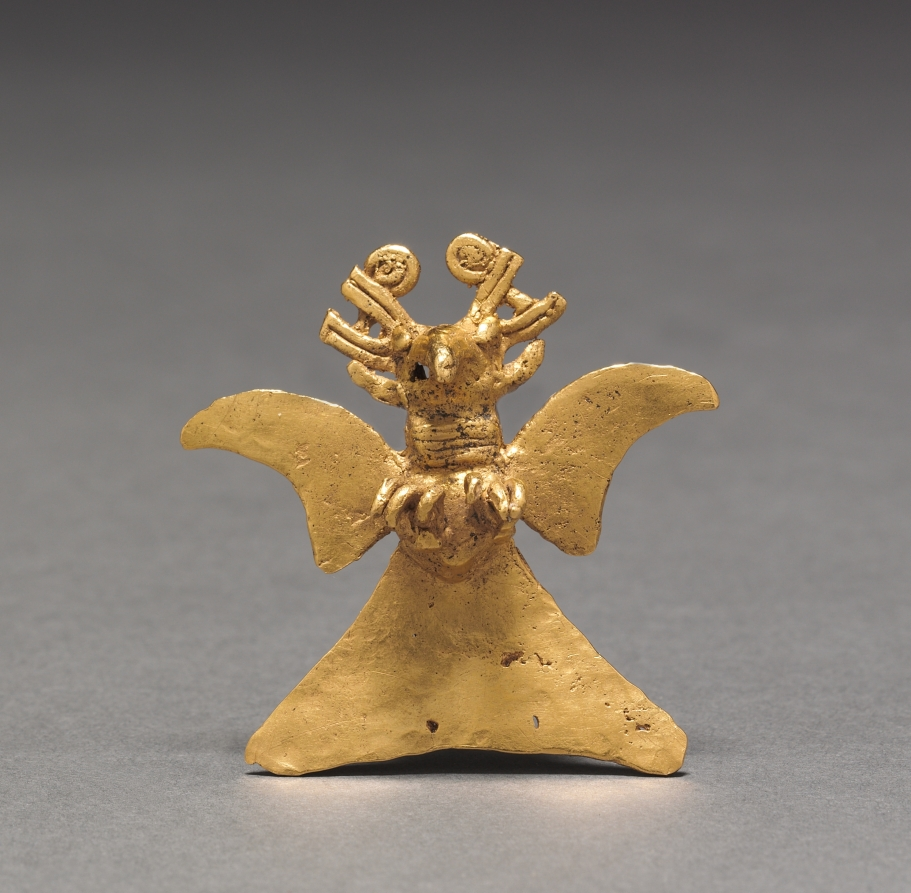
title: Bird Pendant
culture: Panama, Veraguas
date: 1000–1500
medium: cast and hammered gold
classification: Metalwork